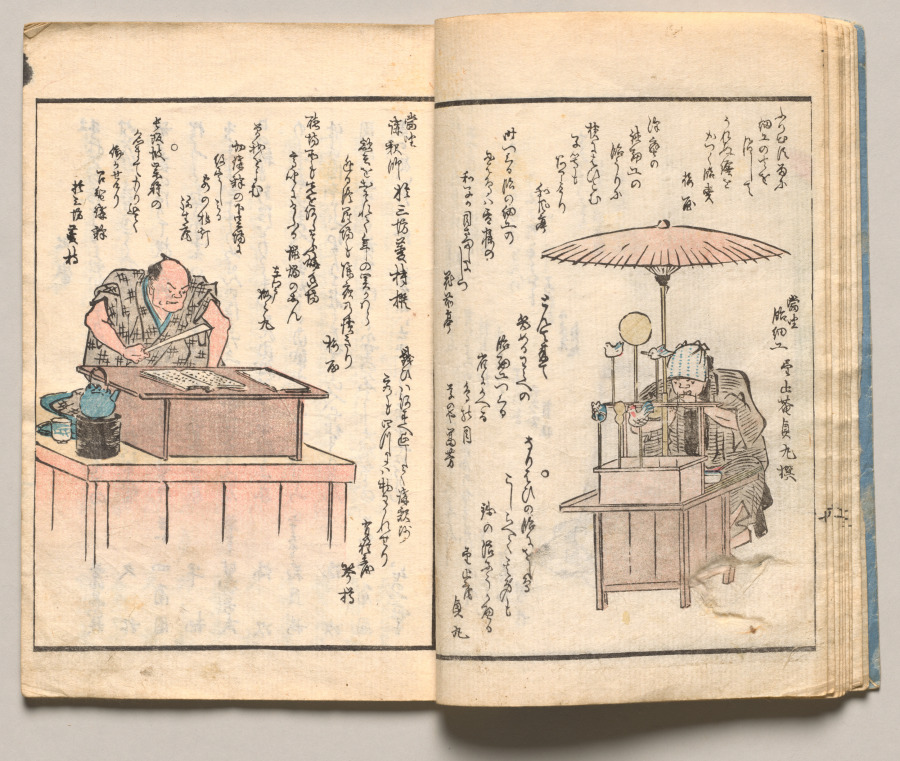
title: Spread Nine from Volume One of People of Japan in Light Verse (Kyōka)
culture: Japan, Edo period (1615–1868)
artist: Utagawa Hiroshige (Japanese, 1797–1858)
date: 1857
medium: Woodblock-printed book; ink and color on paper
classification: Bound Volume